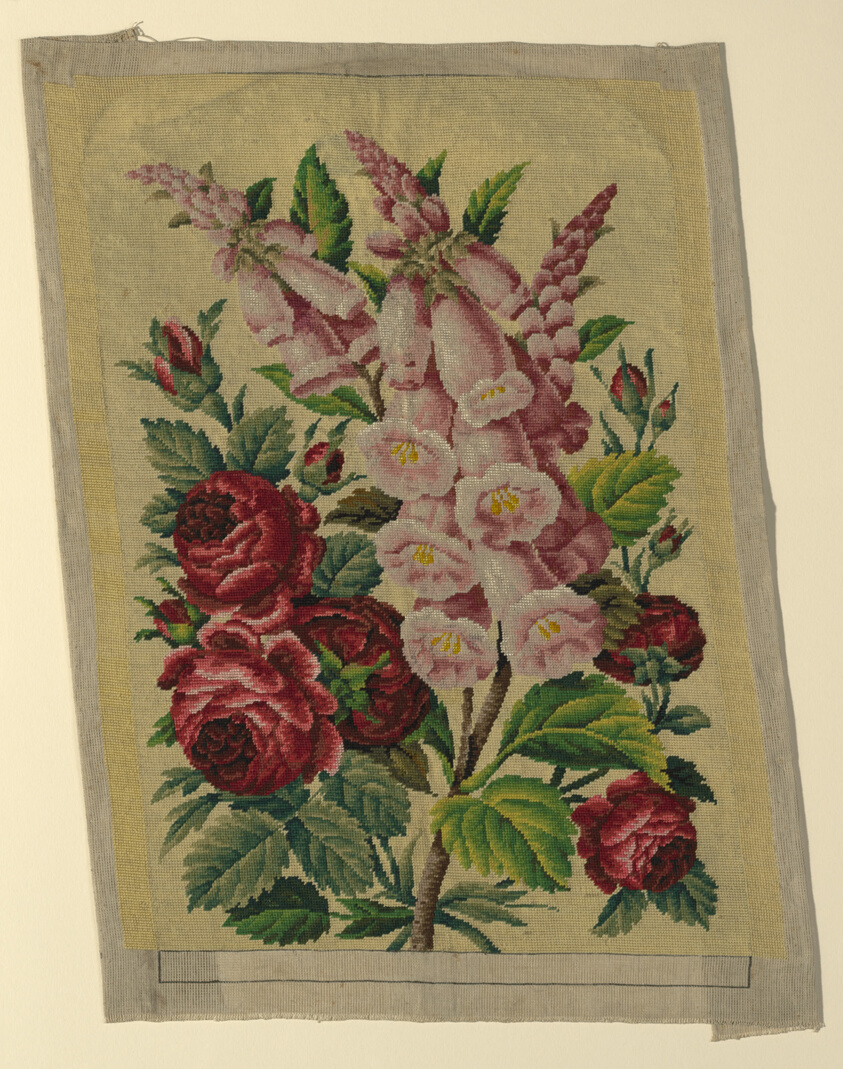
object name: Textile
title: Chair Seat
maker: England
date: 19th century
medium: Linen, plain weave; embroidered with wool in tent stitches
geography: England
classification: textile; needlework (visual works)